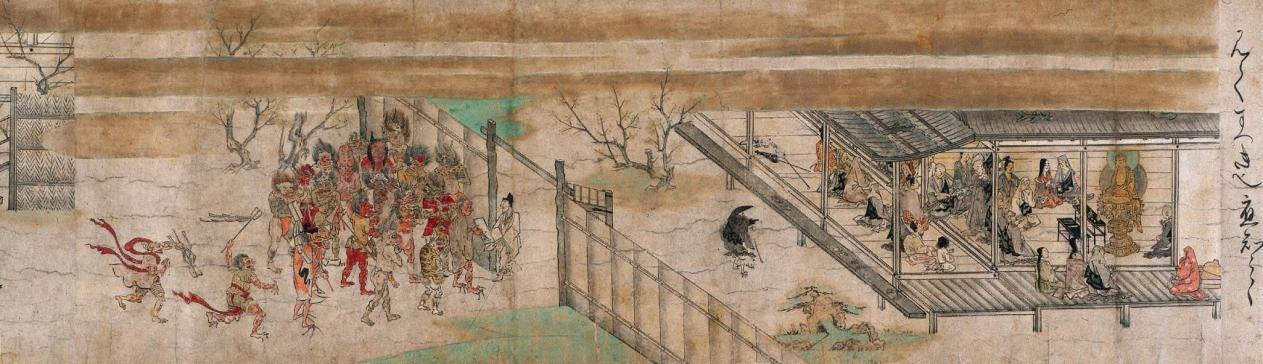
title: The Illustrated Miraculous Origins of the Yūzū Nenbutsu School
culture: Japan, Kamakura period (1185–1333)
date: early 1300s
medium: Handscroll; ink, color, and gold on paper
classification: Painting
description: This painting is the second of a set of two illustrated handscrolls. The first scroll depicts the biography of the Japanese Buddhist monk Ryōnin. This scroll begins with scenes of Ryōnin’s death and relates episodes illustrating the efficacy of following his teachings. Ryōnin asserted the total interconnectedness of all things and the spiritual benefit of chanting the name of the Buddha Amida for one another.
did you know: The other scroll from this two-scroll set belongs to the Art Institute of Chicago.